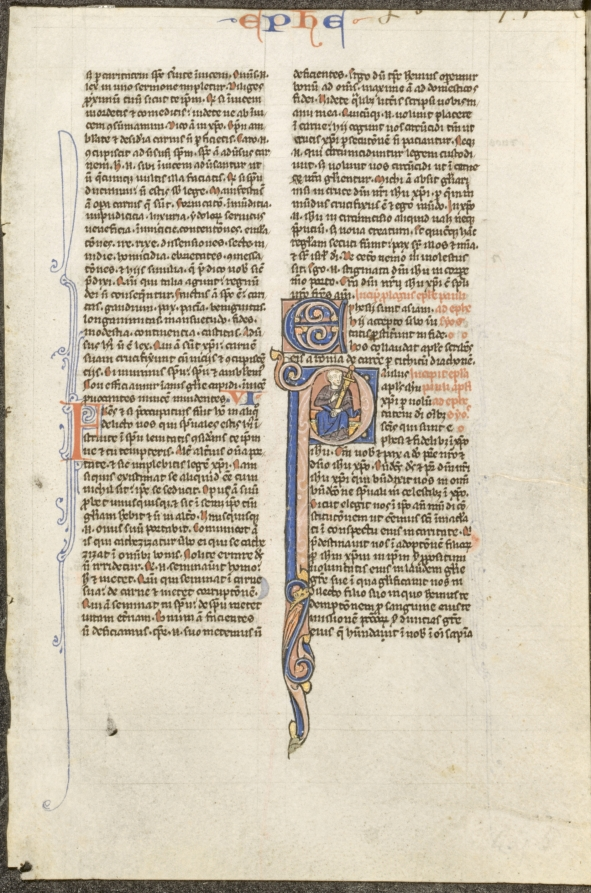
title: Leaf from a Latin Bible: Initial P with St. Paul Holding a Sword (St. Paul's Epistle to the Ephesians)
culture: France, Paris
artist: circle or workshop of Johannes Grusch Atelier (French)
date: c. 1250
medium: ink, tempera, and gold on vellum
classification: Manuscript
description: The Johannes Grusch Workshop is named for the priest responsible for copying one of its bibles in 1267. The shop first appeared on the scene during the late 1230s, and a group of 39 manuscripts has been identified. The workshop's oldest dated work is a missal made for Rouen Cathedral between 1235 and 1245. The style expressed by the Grusch artist consists of flat little figures with inked draperies of a fairly irregular sort. The bodies have white heads with small features, like the short-bearded chins of the men and pursed mouths. A large number of painters were apparently associated with this workshop, which changed its style considerably over its thirty-year period of activity. Its painting can be divided into early, middle, and late styles.